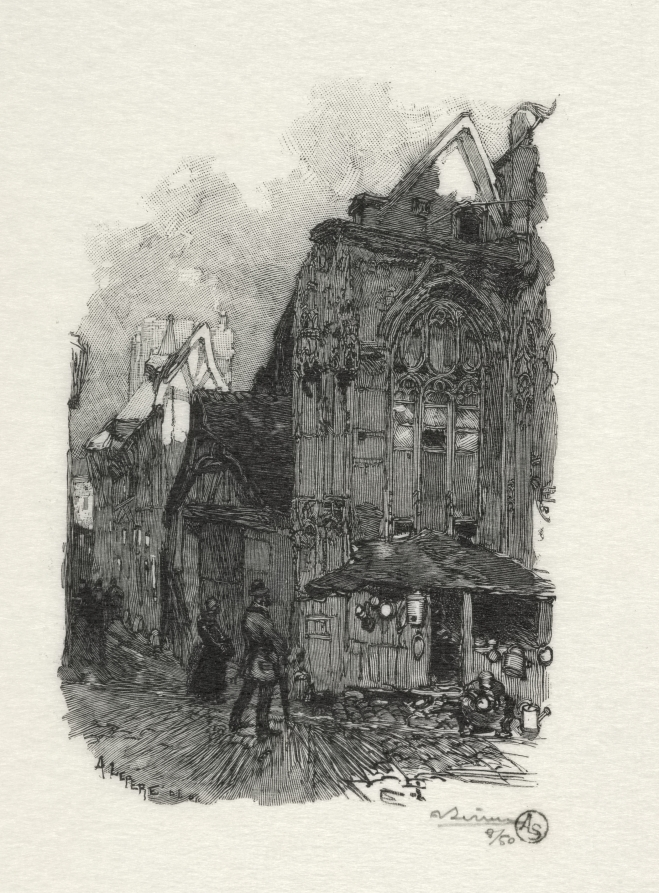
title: Rouen Illustré: Saint Etienne des Tonneliers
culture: France, 19th century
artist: Auguste Louis Lepère (French, 1849–1918)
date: 1896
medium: wood engraving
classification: Print